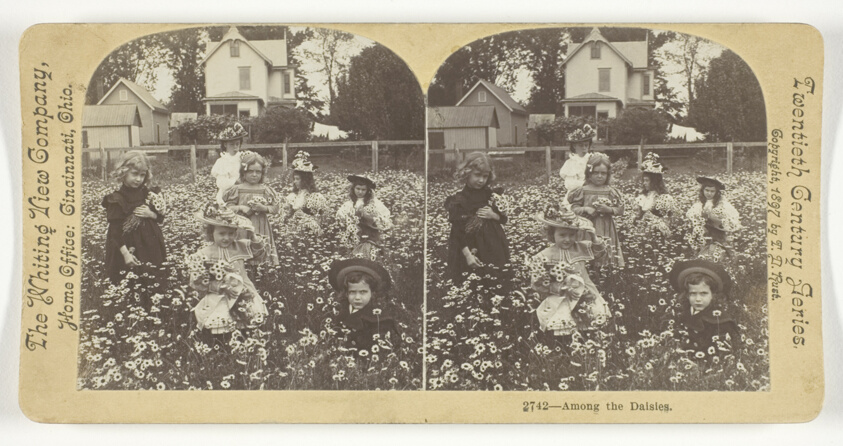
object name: Photograph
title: Among the Daisies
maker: T.D. Rust (American, active late 19th century)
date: 1897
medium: Albumen print, stereo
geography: Cincinnati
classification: photography; photograph; albumen silver print; stereograph (albumen)